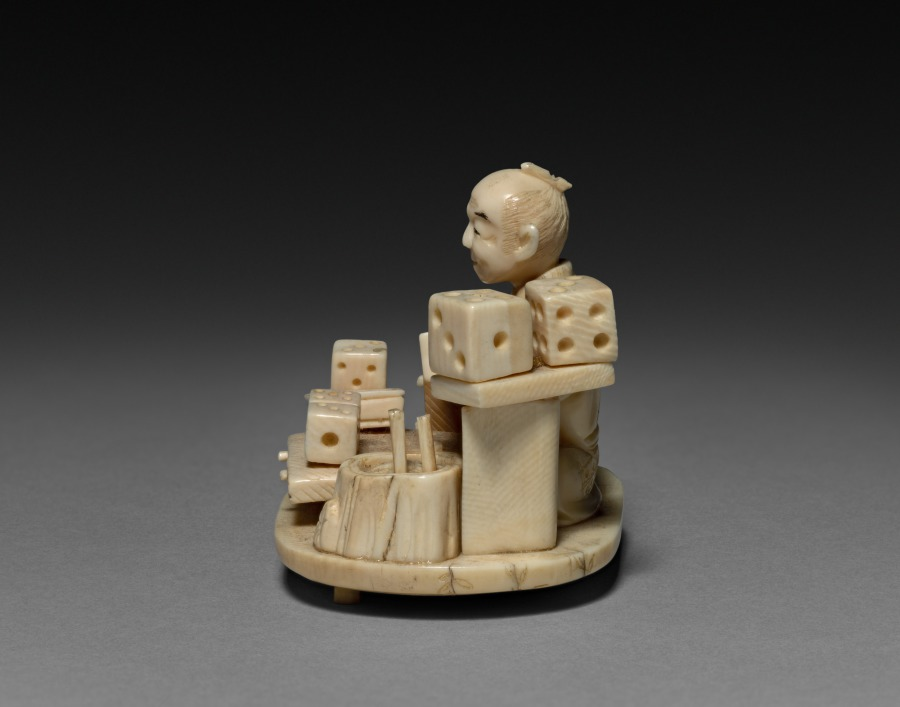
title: Man with Dice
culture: Japan, Edo period (1615–1868) to Meiji period (1868–1912)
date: 1800s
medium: ivory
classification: Netsuke